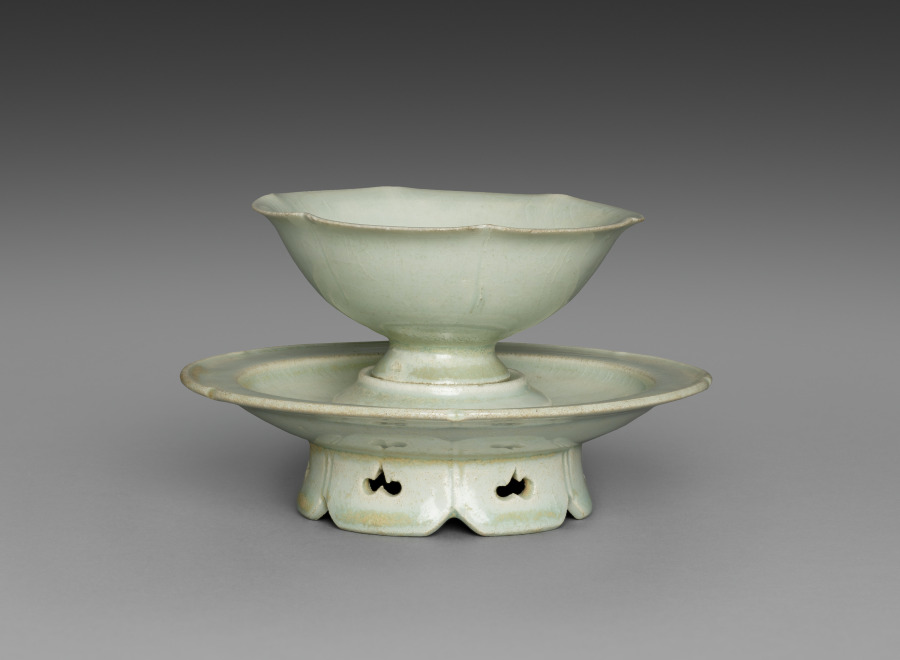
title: Cup and Stand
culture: China, Jiangxi province, Jingdezhen, Southern Song dynasty (1127-1279)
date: 1100s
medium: Porcelain with pale bluish-white glaze, qingbai ("blue-white") ware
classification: Ceramic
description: The kilns of Jingdezhen in Jiangxi province produced an extremely delicate porcelain made from the local resources of kaolin (white China clay) and petuntse (a feldspathic rock called china stone). It is glazed with a clear bluish-white glaze, thus the name qingbai (blue-white) or yingqing (shadowy blue) for this type of ware.